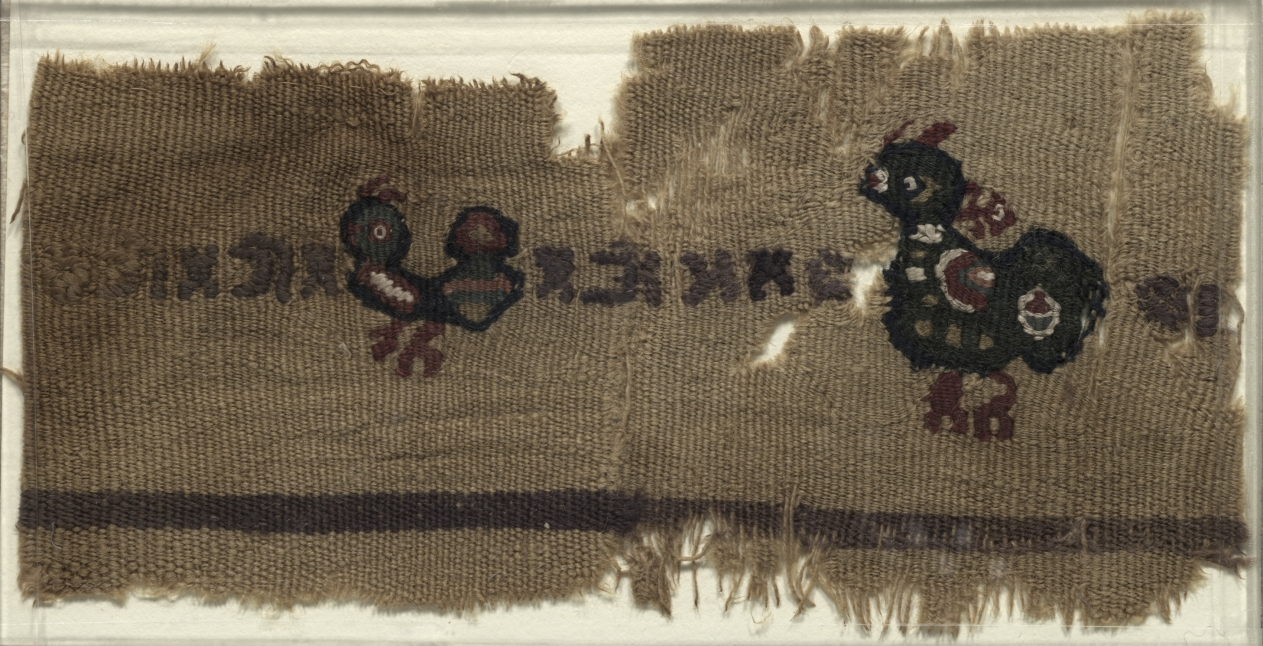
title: Tapestry with Birds and Greek Letters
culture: Egypt, Byzantine period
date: 400s - 600s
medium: tapestry weave; wool and linen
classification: Tapestry